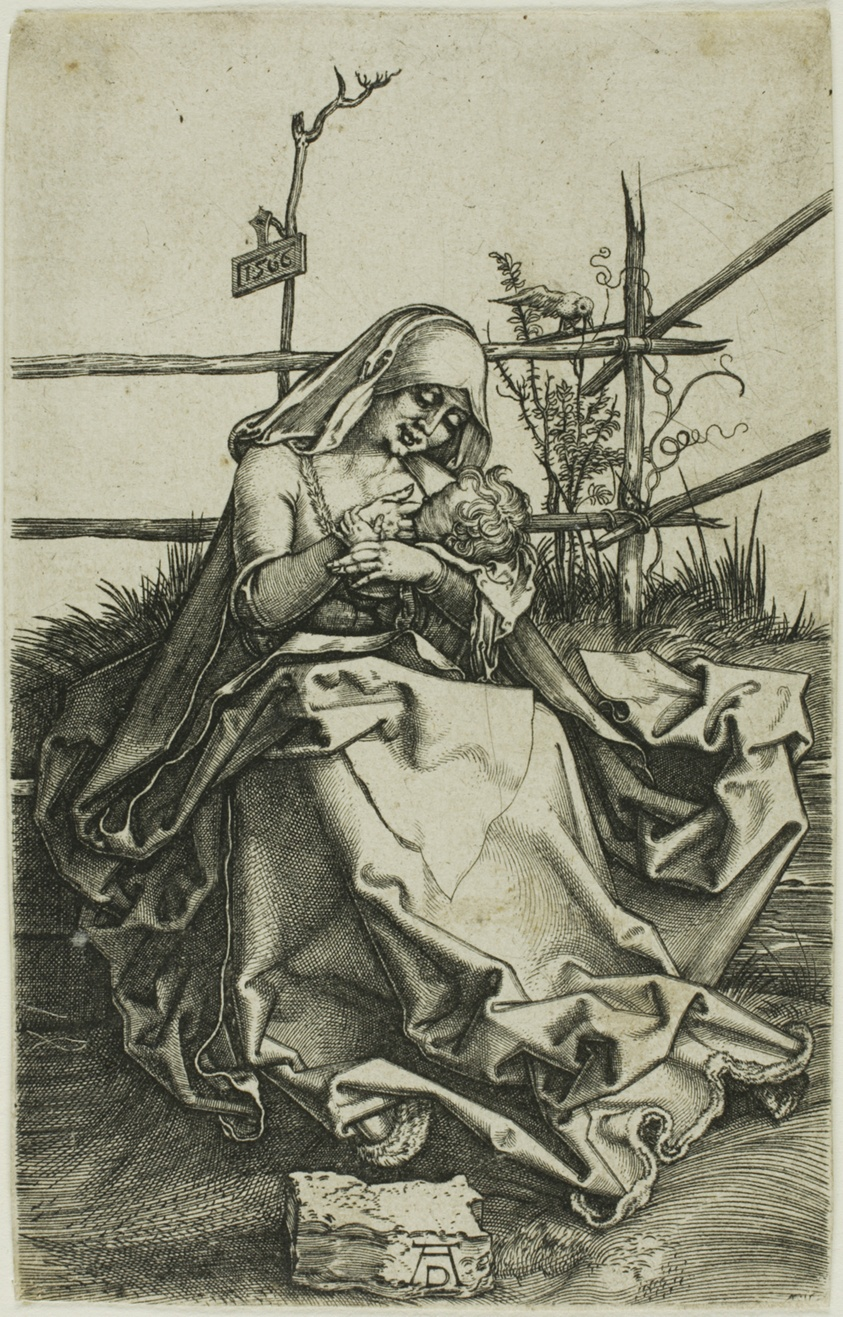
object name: Print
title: Madonna on a Grassy Bank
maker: After Albrecht Dürer (German, 1471-1528)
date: 1566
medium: Engraving on ivory laid paper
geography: Germany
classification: engraving; print; prints and drawing; paper